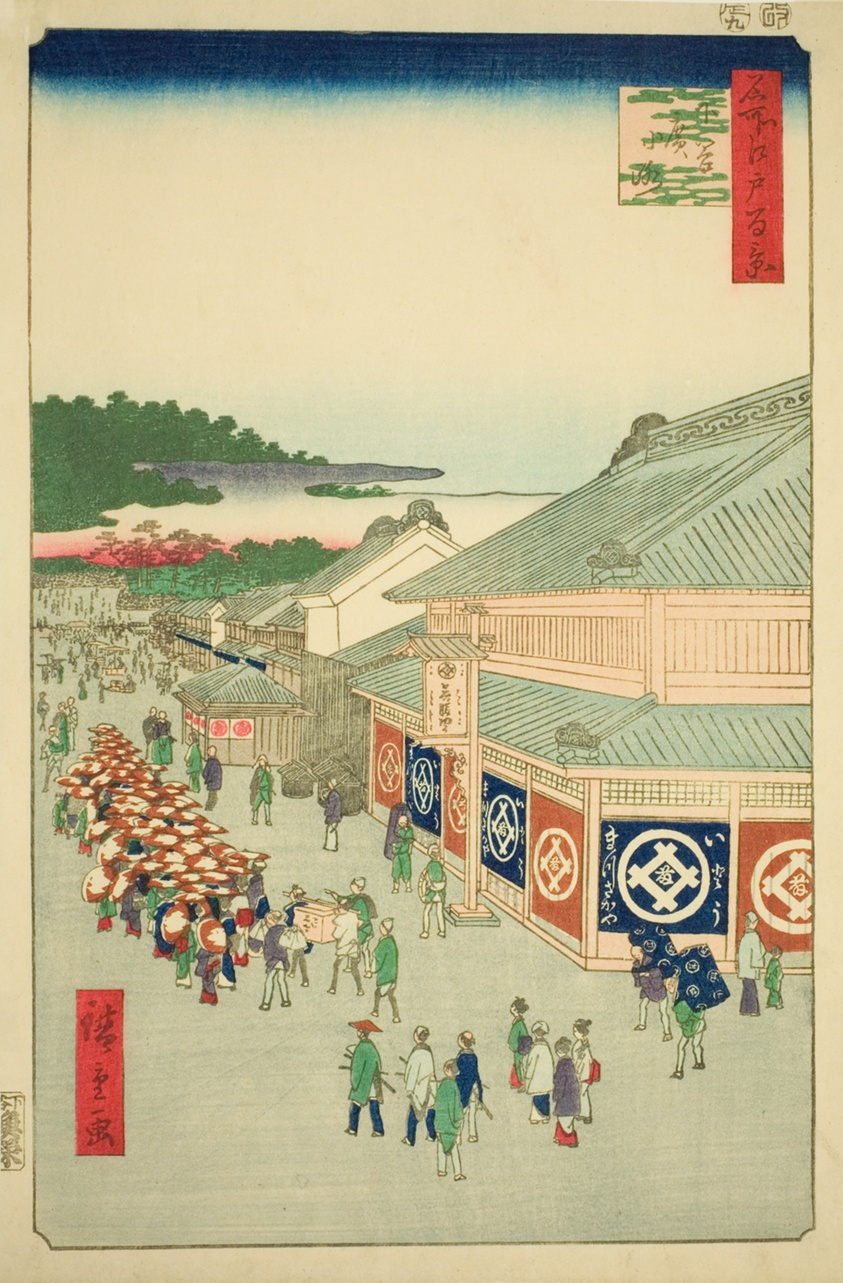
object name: Print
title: Shitaya Hirokoji, No.13 from the series "One Hundred Famous Views of Edo (Meisho Edo hyakkei)"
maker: Utagawa Hiroshige (Japanese, 1797-1858)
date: 1856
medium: Color woodblock print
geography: Japan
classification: woodblock print; print; asian art